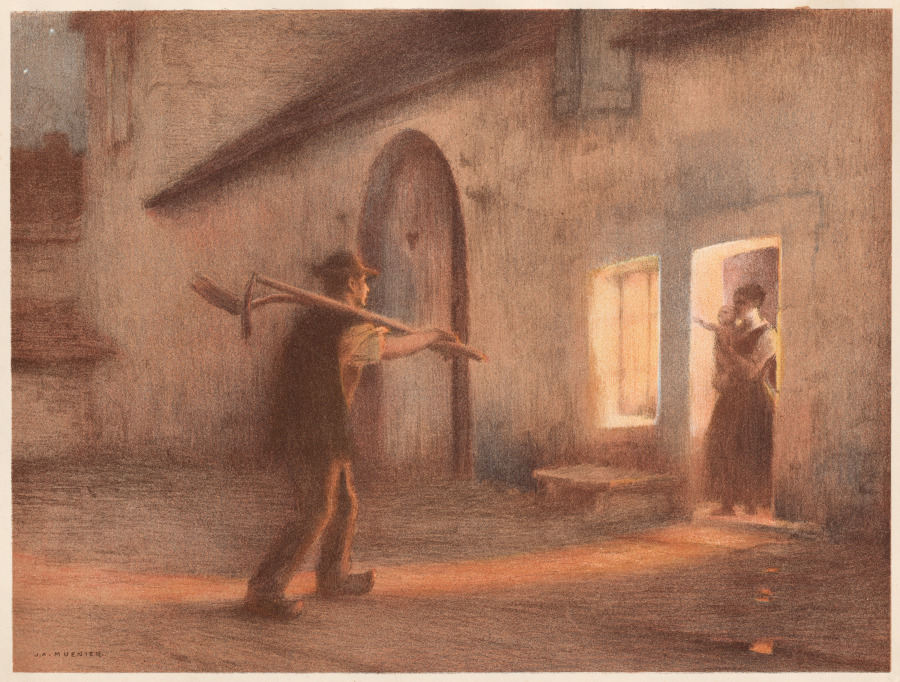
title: Le Retour des Champs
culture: France, Paris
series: L'Estampe Moderne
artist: Jules-Alexis Muenier (French, 1863–1942)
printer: Imprimerie Champenois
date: 1898–1899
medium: Color lithograph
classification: Bound Volume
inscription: In plate: lower left corner of image: J.A. MUENIER.; upper right corner: blindstamp of l'Estampe Moderne (Lugt 2790)